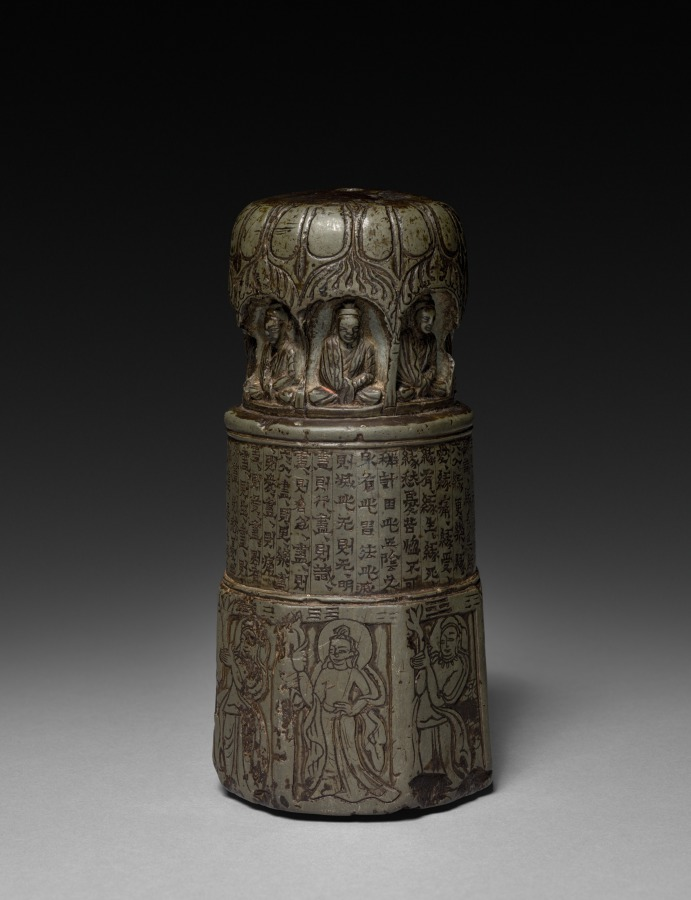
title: Miniature Votive Stupa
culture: China, Gansu province, Northern Wei dynasty (386-534)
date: 435 CE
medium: steatite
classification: Sculpture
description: This sutra pillar, inscribed with a sacred Buddhist text, belongs to a group of miniature stupas (jingta) that were found exclusively in the Gansu corridor, Northwest China. Ranging in date between AD 426–36, some of them bear the names of the lay Buddhist donors who commissioned them. A stupa is an architectural round structure built for the veneration of Buddhist relics. Miniature stupas may have commemorated the visit of a sacred site or represented donations to religious communities and sites.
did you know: There are trigrams, three horizontal lines, broken or continuous, above each of the eight bodhisattvas in the stupa's lower section.